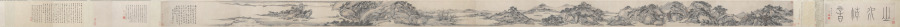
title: Pure Tones among Hills and Waters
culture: China, Qing dynasty (1644-1911)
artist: Xiao Yuncong (Chinese, 1596–1673)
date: 1664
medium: Handscroll; ink and light color on paper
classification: Painting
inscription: 種松發秀色，具是高人心。/ 鑿石築茅屋，長年覆綠陰。/ 白雲無意出，舒卷趨空林。/ 萬籟時一寂，微風墮清音。/ 此情莫可擬，此景誰能論。/ 只向千峰裏，共彈五絃琴。/ 桃花依綠水，不覺又春深。 甲辰花朝題于青蓮閣, 鐘山老人蕭雲從。[印] 鐘山老人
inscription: Title and inscription, dated 1744, and 3 seals of Shen Feng 沈鳳 (1685-1755).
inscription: 4 colophons and 24 additional seals: 1 colophon, dated 1811, and 5 seals of Xiang Yuan 項源 (active about 1811); 1 colophon, dated 1858, and 2 seals of Qi Junzao 祁寯藻 (1793-1866); 1 colophon and 4 seals of Zhang Yunzhong 張允中 (1881–1960?); 4 seals of Jiang Xun 江恂 (active about 1753–after 1780); 1 colophon dated 1943, and 2 seals of Wang Shaoming 汪兆銘 (Wang Jingwei 汪精衛, 1883–1944); 1 seal of Qi Zhiliu 祁之鏐 (active about 1858); 2 seals of Yu Zhimeng 俞芷盟 (second half of 19th century); 4 seals unidentified.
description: Painted at age 68, this landscape is one of Xiao Yuncong’s most mature works. Extraordinary in its combination of fine details with bold brushstrokes and bluish washes, it is also one of his longest compositions in handscroll format, extending over 23 feet. Throughout his lifetime, Xiao visited Nanjing and Yangzhou, where he met with other painters and literati. Regarded as the founder of the Gushu school (姑孰派) of painting, Xiao painted from nature, and his landscapes are informed by his travels, as well as by his experience as a print designer.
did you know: Biographical notes on Xiao Yuncong relate that he did not pursue the career of an official, but "furnished a cottage in the eastern suburbs [of Wuhu in Anhui province] and amused himself playing the qin (zither) and reading every day."